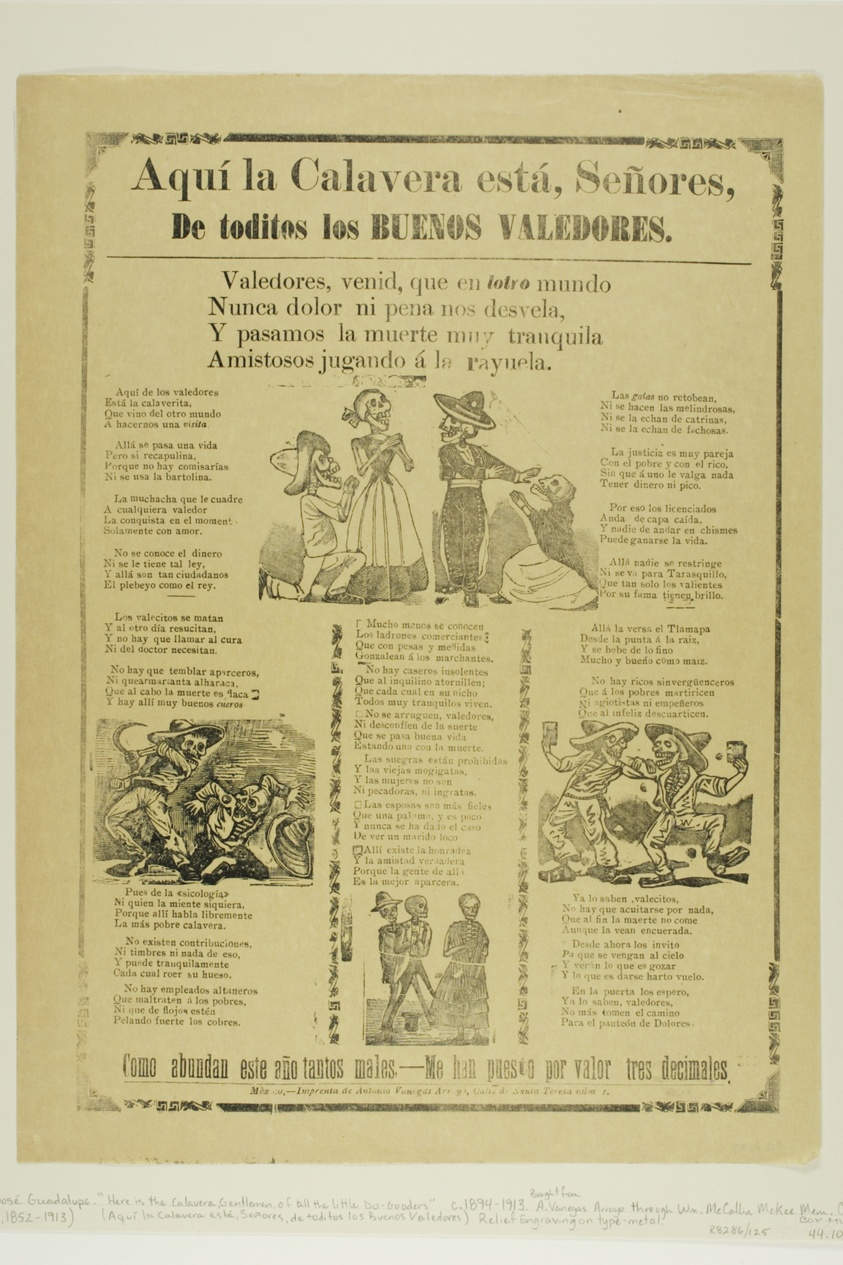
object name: Print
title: Here is the Calavera, Gentlemen, of all the Little Do-Gooders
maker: José Guadalupe Posada (Mexican, 1852-1913)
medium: Relief engraving on typemetal on paper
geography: Mexico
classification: relief etching; print; prints and drawing